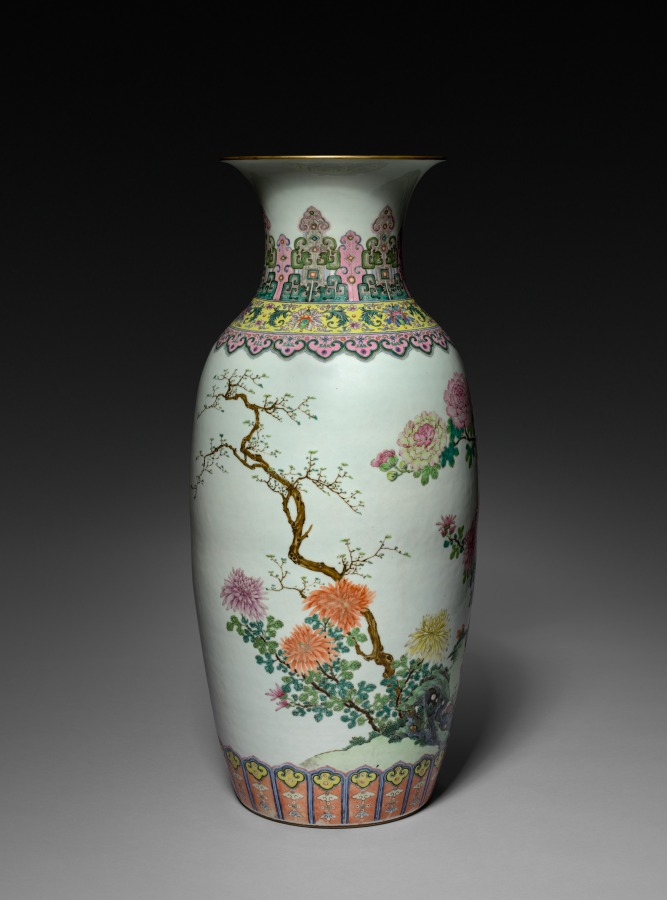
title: Vase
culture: China, Qing dynasty (1644–1911), Qianlong reign (1736–95)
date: 1736–95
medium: porcelain with famille rose overglaze enamel decoration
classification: Ceramic